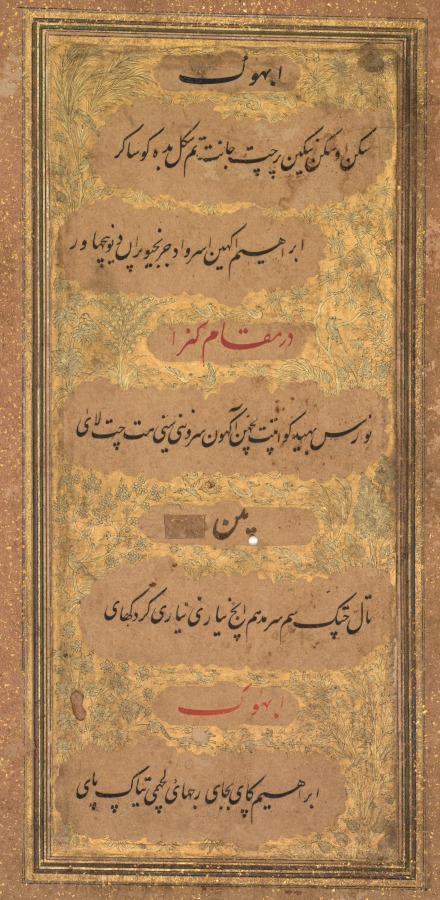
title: From Dohras (Songs) 40 and 42 from the Kitab-i Nauras (Book of Nine Essences) of Sultan Ibrahim Adil Shah II of Bijapur (r. 1580–1627) (recto)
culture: India, Bijapur, Deccan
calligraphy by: Khalilullah Butshikan (Persian, active in India 1596–c. 1620)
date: 1618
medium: ink with two-tone gold on paper, double-sided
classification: Painting